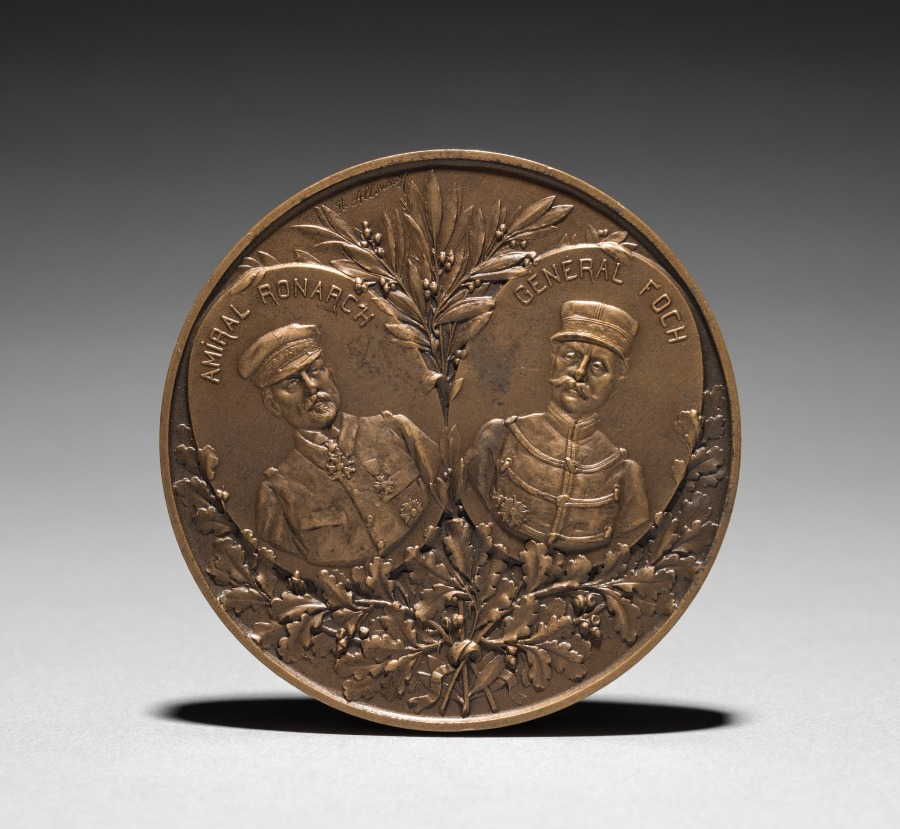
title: Medallion (reverse)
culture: France, 19th-20th century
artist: Henri Emile Allouard (French, 1844–1929)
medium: bronze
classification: Metalwork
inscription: "Amiral Ronarch General Foch."